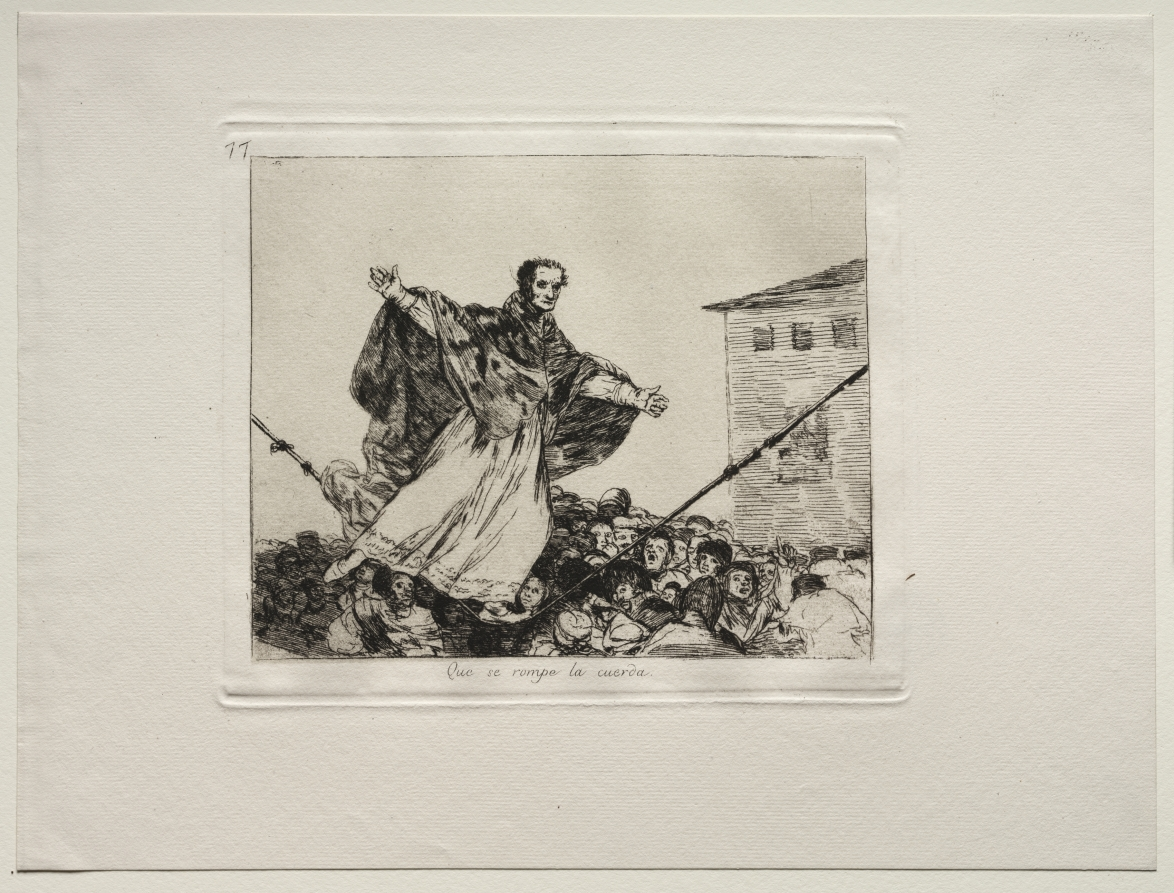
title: The Horrors of War: May the Cord Break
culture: Spain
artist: Francisco de Goya (Spanish, 1746–1828)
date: c. 1810–20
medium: etching and aquatint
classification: Print